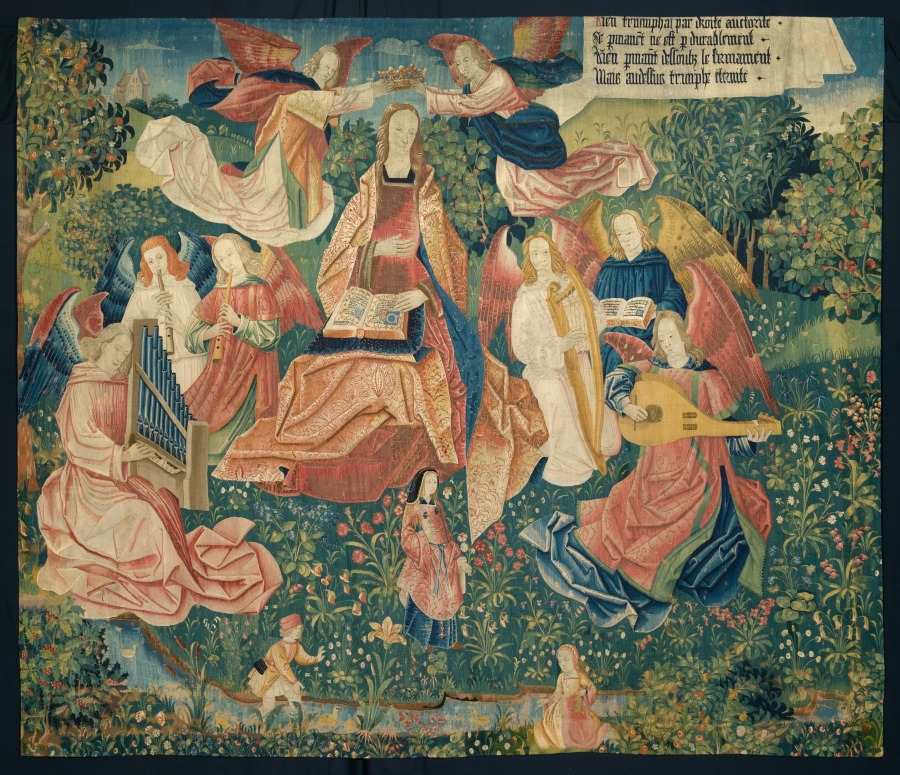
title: Chateau de Chaumont Set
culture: France, Lyon(?), early 16th century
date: 1512–1515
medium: silk and wool; tapestry weave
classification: Tapestry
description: Louise of Savoy (1476-1531), queen mother of King Francis I, is depicted here in a sumptuous brocaded velvet in the center. She addresses youthful figures including Éléonore, Pierre Sala’s daughter who is facing her future husband, Hector. On the right, King Louis XII (died 1514) stands in front of the Chateau Langais where he had married Anne of Brittany. Above is Hector’s deceased father with a partially concealed skull under his robe, while a woman expresses surprise at the sight. The verse in Old French at the top states that youthful happiness is not eternal: Youth makes sounds as long as its heart is healthy, And thinks that it holds all in its hand. But this triumph is not eternal. Here you see clearly an example: He that is happy has death in his breast. Of this you people should take note.